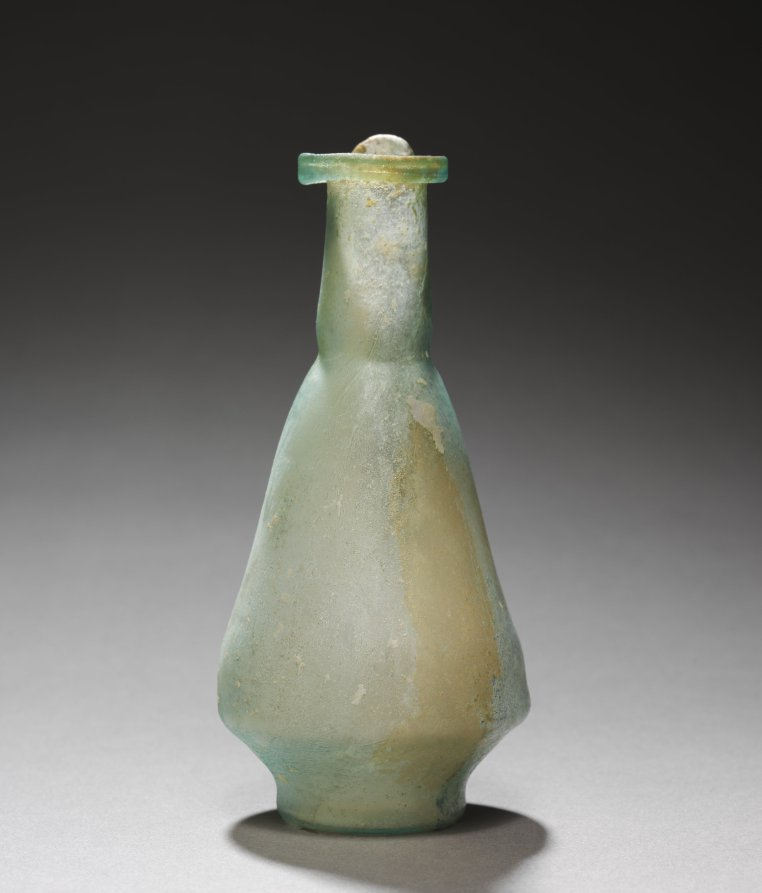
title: Jug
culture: Cyprus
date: 100–300 CE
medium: glass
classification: Glass